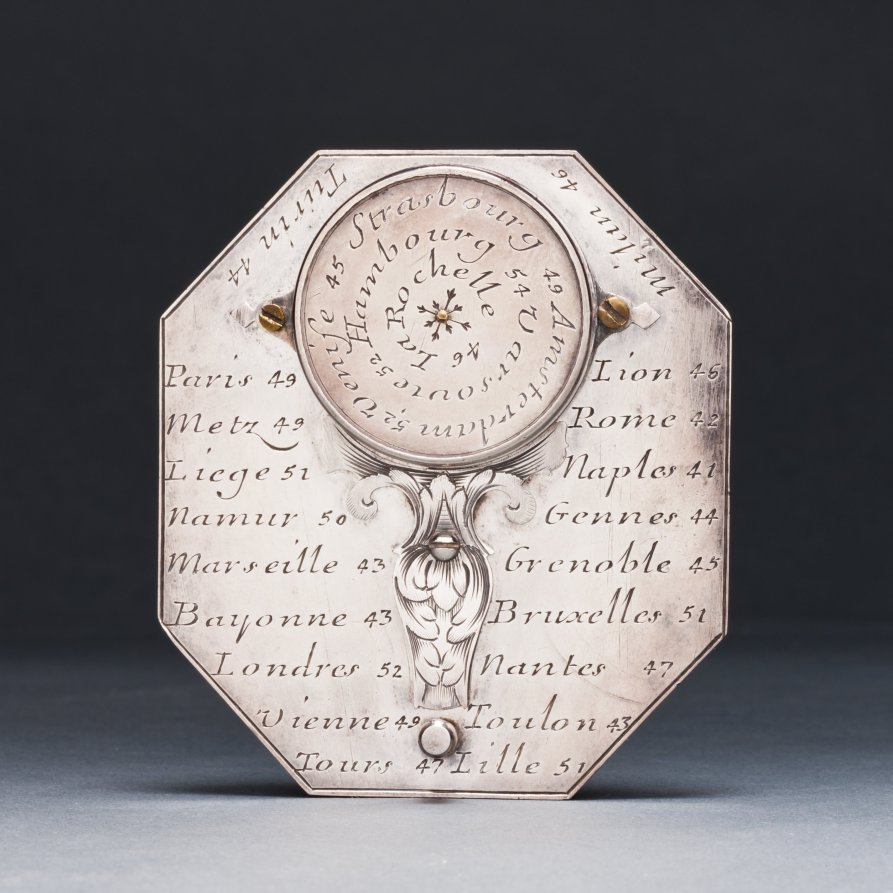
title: Butterfield Sundial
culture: France, 18th century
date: 1700s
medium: silver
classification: Silver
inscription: [Engraved signature above the compass in ribbon band]: "N. BION A Paris"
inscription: [Engraved on the face of the sundial]: “Pour 55° 4-5-6-7-8-9-10-11 50° IIII-V-VI-VII-VIII-IX-X-XI 45° 5-6-7-8-9-10-11 40° -VI-VII-VIII-IX-X-XI'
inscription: [Engraved on the other side]: "Pour 55° -8-7-6-5-4-3-2-1-0 50°-VIII-VII-VI-V-IIII-III-II-I 45°-8-7-6-5-4-3-2-1 40°-VII-VI-V-IIII-III-II-I"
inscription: [Engraved around the compass]: “NORD-OUEST-SUD-EST”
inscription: [Engraved on the back of the sundial]: “Turin 44 Milan 46 Paris 49 Lion 46 Metz 49 Rome 42 Liege 51 Naples 44 Namur 50 Gennes 44 Marseille 43 Grenoble 45 Bayonne 43 Bruxelle 51 Londres 52 Nantes 47 Vienne 48 Toulon 43 Tours 47 Lille 51”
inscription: [Engraved around the back of the compass]: “Venise 45 Strasbourg 49 Amsterdam 52 Hambourg 54 Varsovie 52 La Rochelle 46”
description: Butterfield-type sundials are characterized by their adjustable gnomons, metal flaps that cast a shadow on the dial’s face to indicate the hour, and geographical indices. This sundial has a scale adjustable between latitudes of 40° to 60° north. The latitudes of 26 European towns are engraved on its back for quick reference. With an intricately engraved silver face, it would have functioned as a fashionable traveler’s accessory.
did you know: Butterfield-style sundials were named after Micheal Butterfield, an English scientific and mathematical instrument maker who worked in Paris between 1674 and 1724.